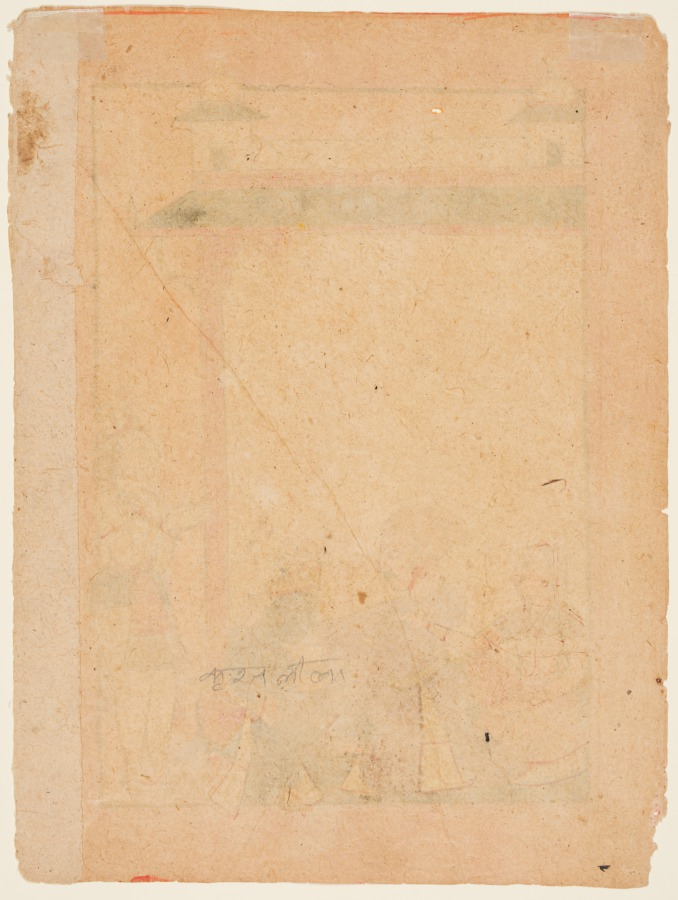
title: Krishna and Balarama touching the feet of Vasudeva and Devaki, from the “Vertical” Bhagavata Purana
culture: Northern India, Pahari kingdoms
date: c. 1700–1725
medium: Gum tempera, gold, and silver on paper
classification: Painting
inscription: vāsudeve tatha devakīyā de pera baṃdadā hoyā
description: This intensely emotional scene depicts the reunion of the blue-skinned god Krishna with his parents for the first time since the night of his birth. The stark white expanse of wall that fills most of the composition evokes the desolate years of separation during which time his parents were in prison. According to the story, Krishna and his half-brother, the white-skinned Balarama, have just slain a wicked king and freed his parents. Nevertheless, they all wear fine garments and ornaments. The artist elected to emphasize the appearance of good fortune over realism, signaling to the viewer that this is a happy reunion.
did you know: Krishna and Balarama wear a ring of bells on each foot.